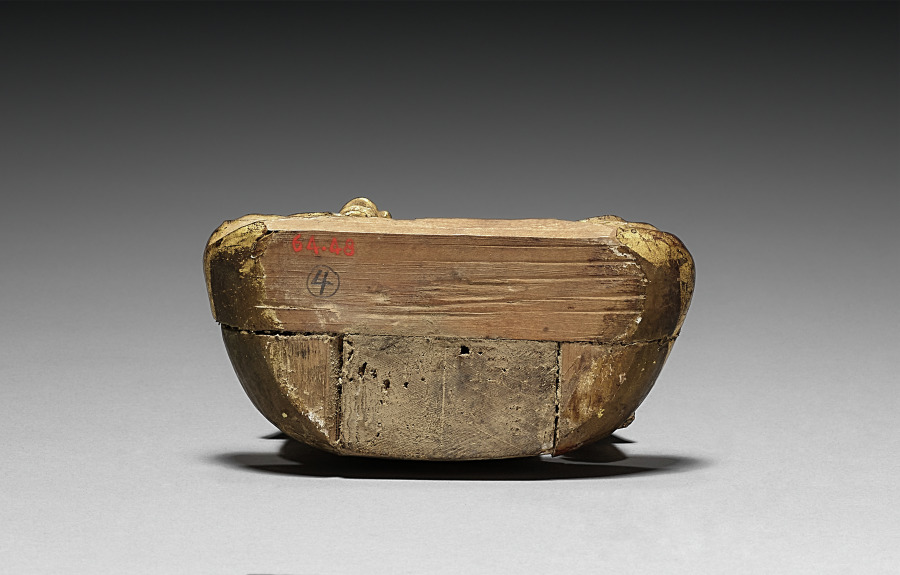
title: Bodhisattva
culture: Japan, Heian period (794–1185)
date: 900s-1100s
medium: gilded wood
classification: Sculpture